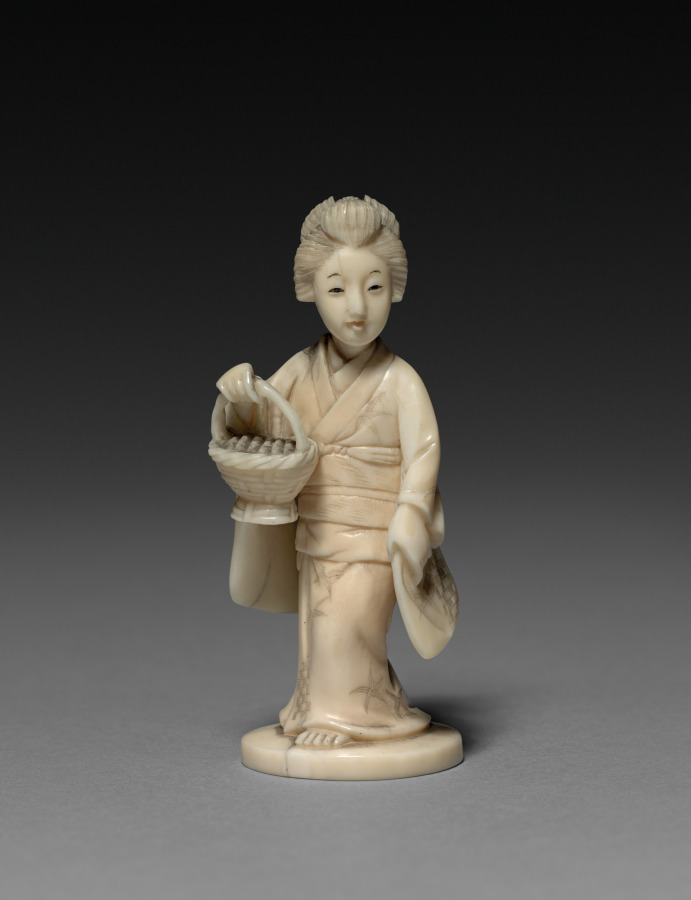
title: Woman Carrying a Basket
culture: Japan, Meiji period (1868–1912)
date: early 1900s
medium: ivory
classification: Ivory